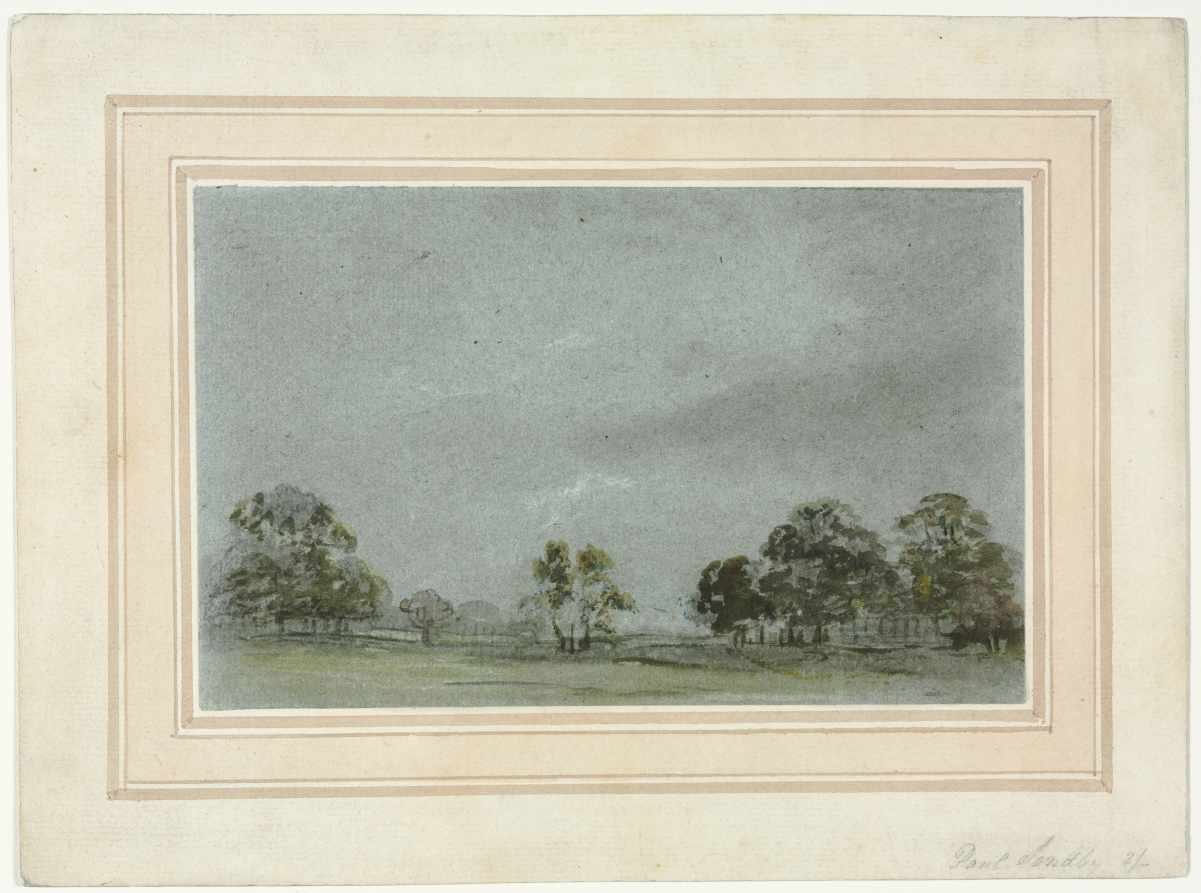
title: Landscape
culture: England, 18th century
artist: Paul Sandby (British, 1731–1809)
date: c. 1751–1809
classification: Drawing